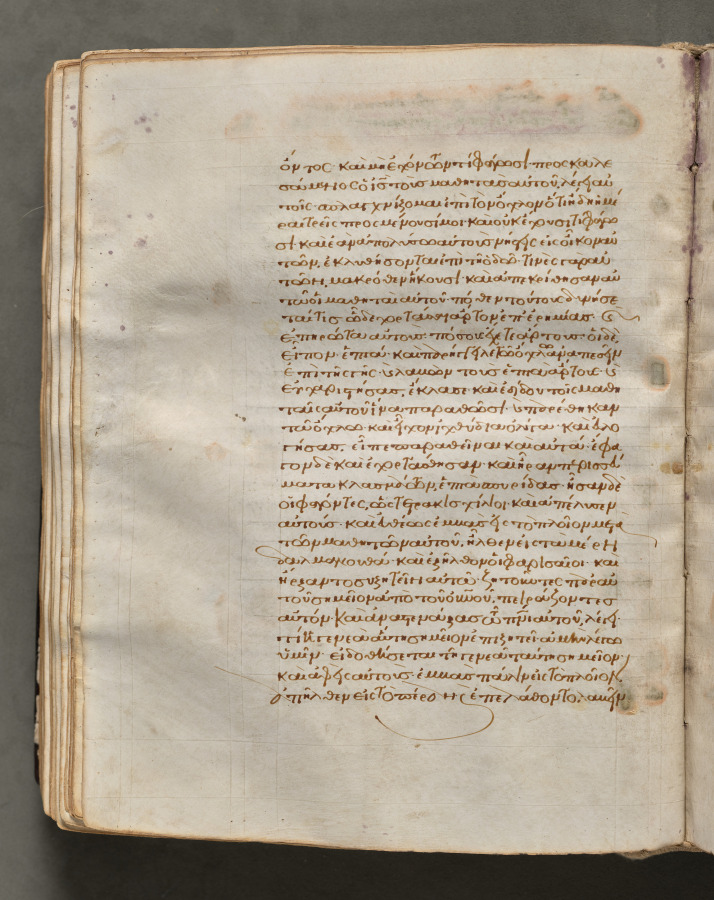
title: Text, folio 157 (verso), from a Gospel Book with Commentaries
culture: Byzantium, Constantinople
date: c. 1000–1100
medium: ink, tempera, and gold on vellum; leather binding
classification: Bound Volume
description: Each of the four gospels in this book opens on a page with brilliantly illuminated borders depicting the author of the text as well as birds-principally peacocks, symbols of the immortality of the soul-and fountains, representing the fountain of life and the salvation of the soul. This volume consists of 428 leaves with texts in Greek. Its level of sophistication suggests that it was probably written and decorated in a monastery in Constantinople.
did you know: Gospel Books were carried in procession through Byzantine churches.